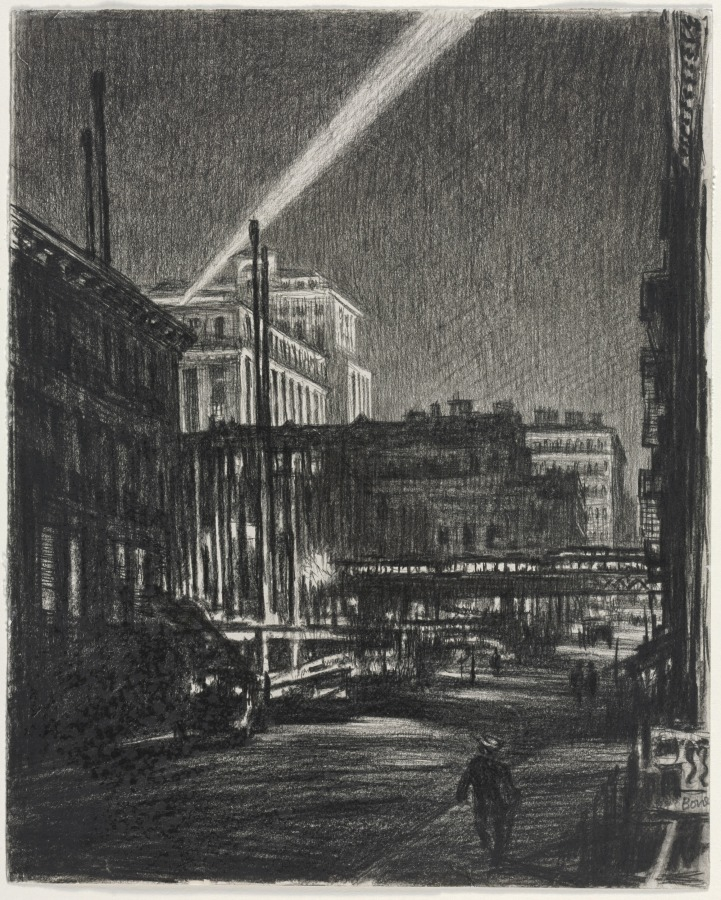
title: New York Night (recto) Study for New York Night (verso)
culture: England, 20th century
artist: Muirhead Bone (British, 1876–1953)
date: c. 1920–40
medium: charcoal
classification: Drawing